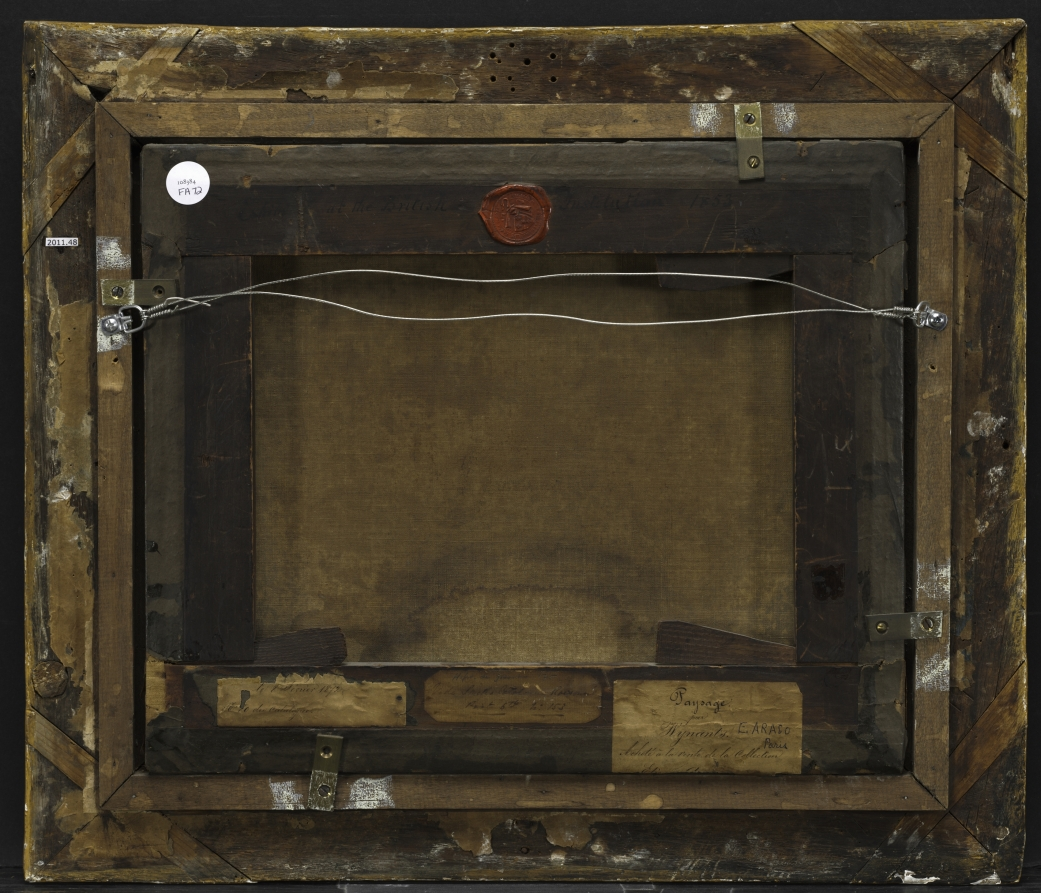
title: Landscape with Hunters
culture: Netherlands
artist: Jan Wijnants (Dutch, 1635–1684)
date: c. 1660–80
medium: oil on canvas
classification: Painting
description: Dune landscapes were a subject of great interest in seventeenth-century Netherlands, among the earliest subjects for independent landscape. They were the bread-and-butter speciality for Wijnants, whose far more unusual Amsterdam canal scene is also in the collection of the CMA.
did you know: To supplement his income as a painter, Jan Wijnants also owned an inn.